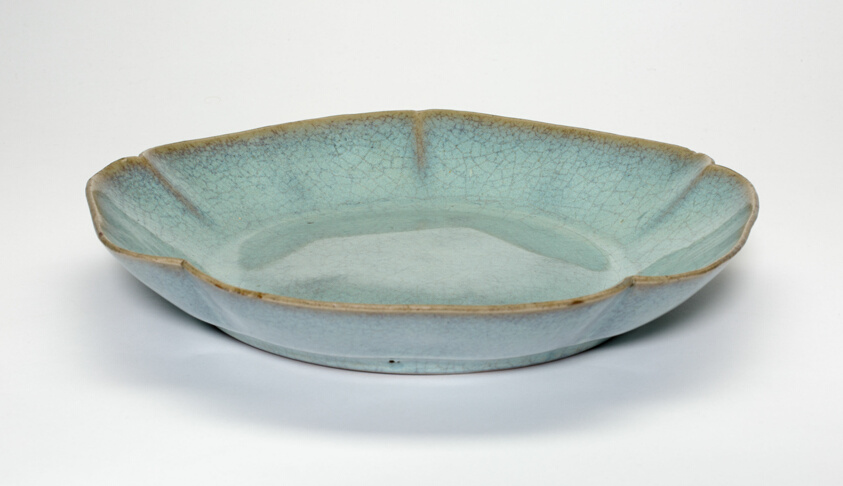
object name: Vessel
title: Dish with Floral Petal Rim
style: Chinese (culture or style)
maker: China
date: Qing dynasty (1644–1911), Yongzheng period (1723–1735)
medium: Stoneware with milky blue Jun ware-style glaze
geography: China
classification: dish (vessel); ceramics; asian art; decorative arts